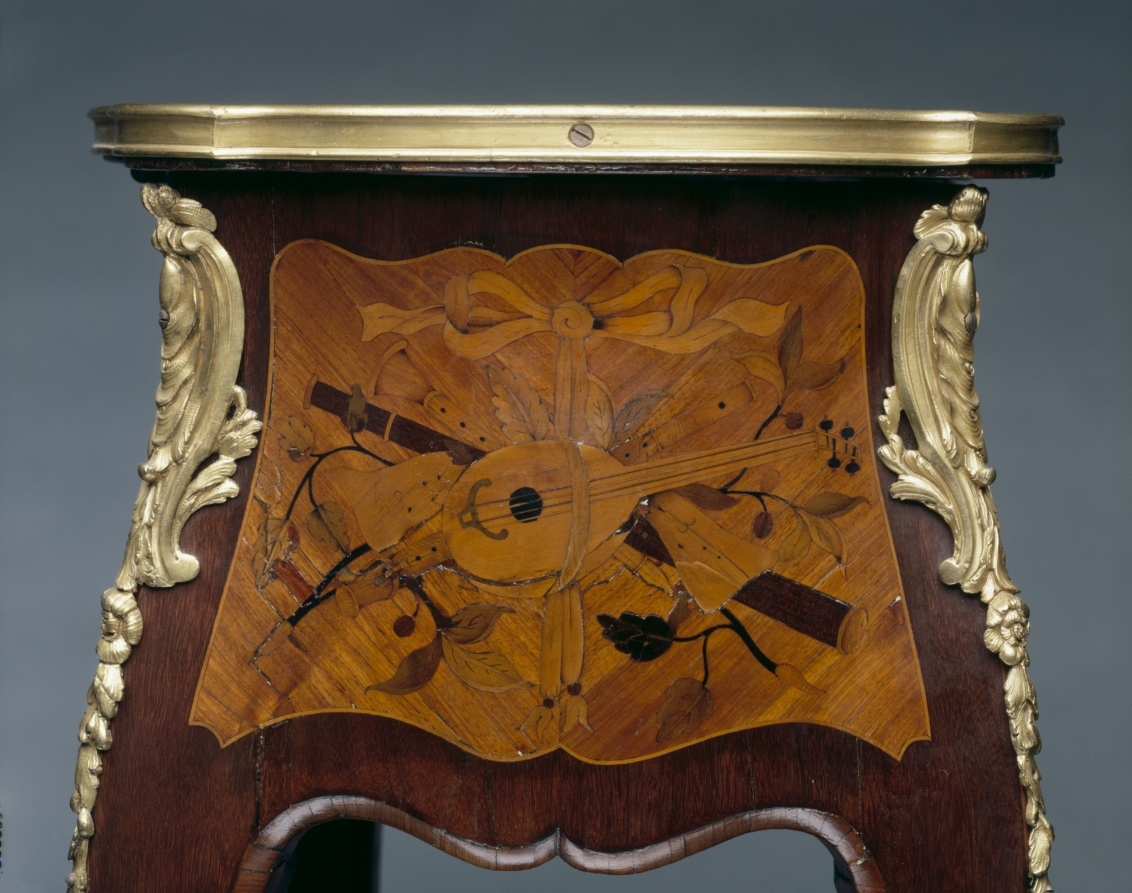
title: Work Table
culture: France, Paris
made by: Bernard Peridiez (French, d. 1757)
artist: or Gerard Peridiez (French, born c.1730)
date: 1700–1799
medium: wood marquetry with gilt bronze mounts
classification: Furniture and woodwork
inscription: signed under shelf: B. Peridiez JNE.